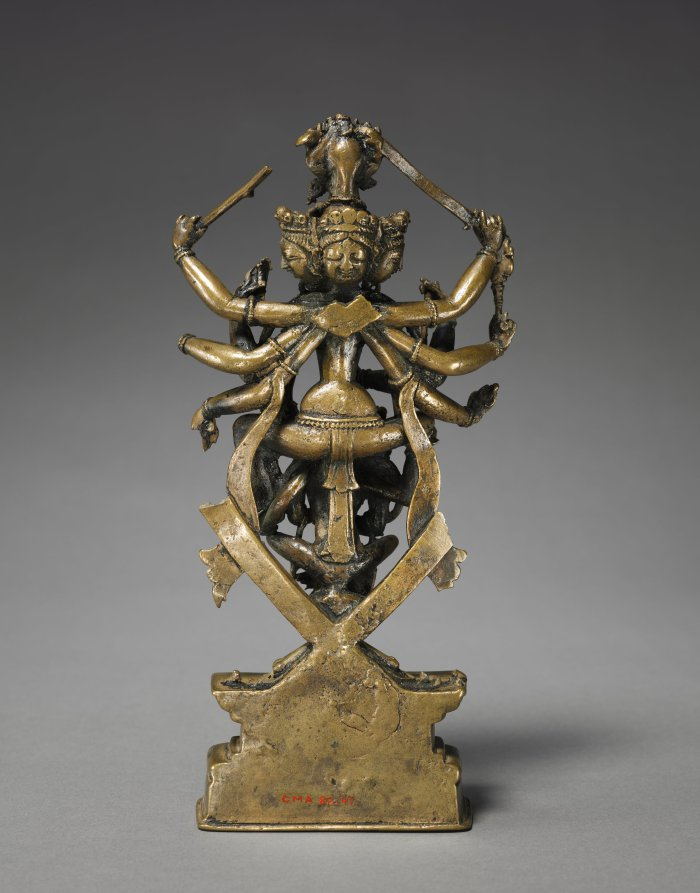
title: Goddess Siddhalakshmi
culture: India, Kashmir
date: 1000s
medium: bronze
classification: Sculpture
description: This specific goddess with five heads and ten arms is described in Hindu ritual handbooks from Kashmir. She is white in color and "rests on a lotus and Shiva." Her left hands hold, from top to bottom: an elephant goad, manuscript, noose (broken), the gift-giving gesture, and a hatchet. In her right hands are a sword, trident, skull staff, skull cup, and the gesture of protection. These objects reveal the awe-inspiring extent of her knowledge, skill, and power to defeat enemies on behalf of her devotees.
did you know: In tantric texts, this goddess is described as white.